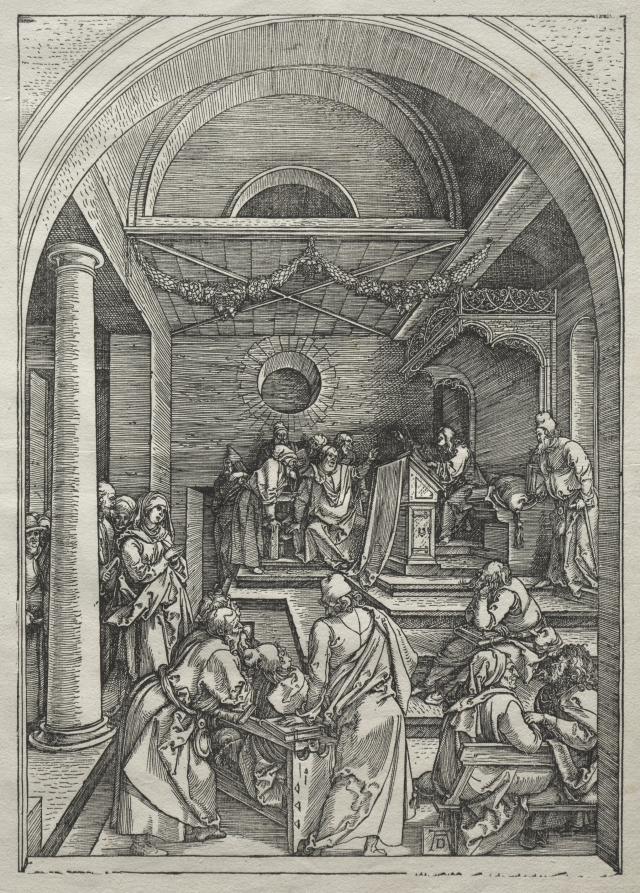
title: Life of the Virgin: Christ Among the Doctors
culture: Germany, early 16th Century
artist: Albrecht Dürer (German, 1471–1528)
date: 1504–1505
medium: woodcut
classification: Print